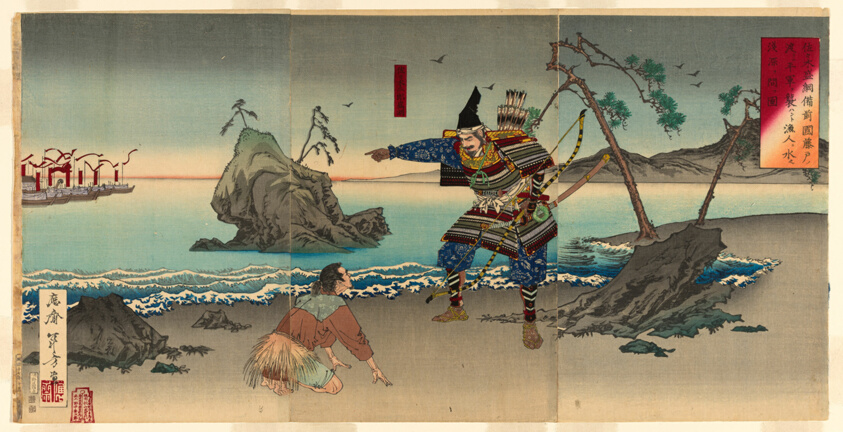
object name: Print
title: Sasaki Moritsuna Asking Fisherman to Reveal the Shallows Where His Troops can Cross and Attack the Taira Forces at Fujito in Bizen Province (Sasaki Moritsuna Bizen no kuni Fujito no watari ni Heigun o osowanto gyojin ni mizu no senshin o tou zu)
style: Japanese (culture or style)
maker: Mizuno Toshikata (Japanese, 1866-1908)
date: 1884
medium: Color woodblock print; oban triptych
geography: Japan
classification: woodblock print; print